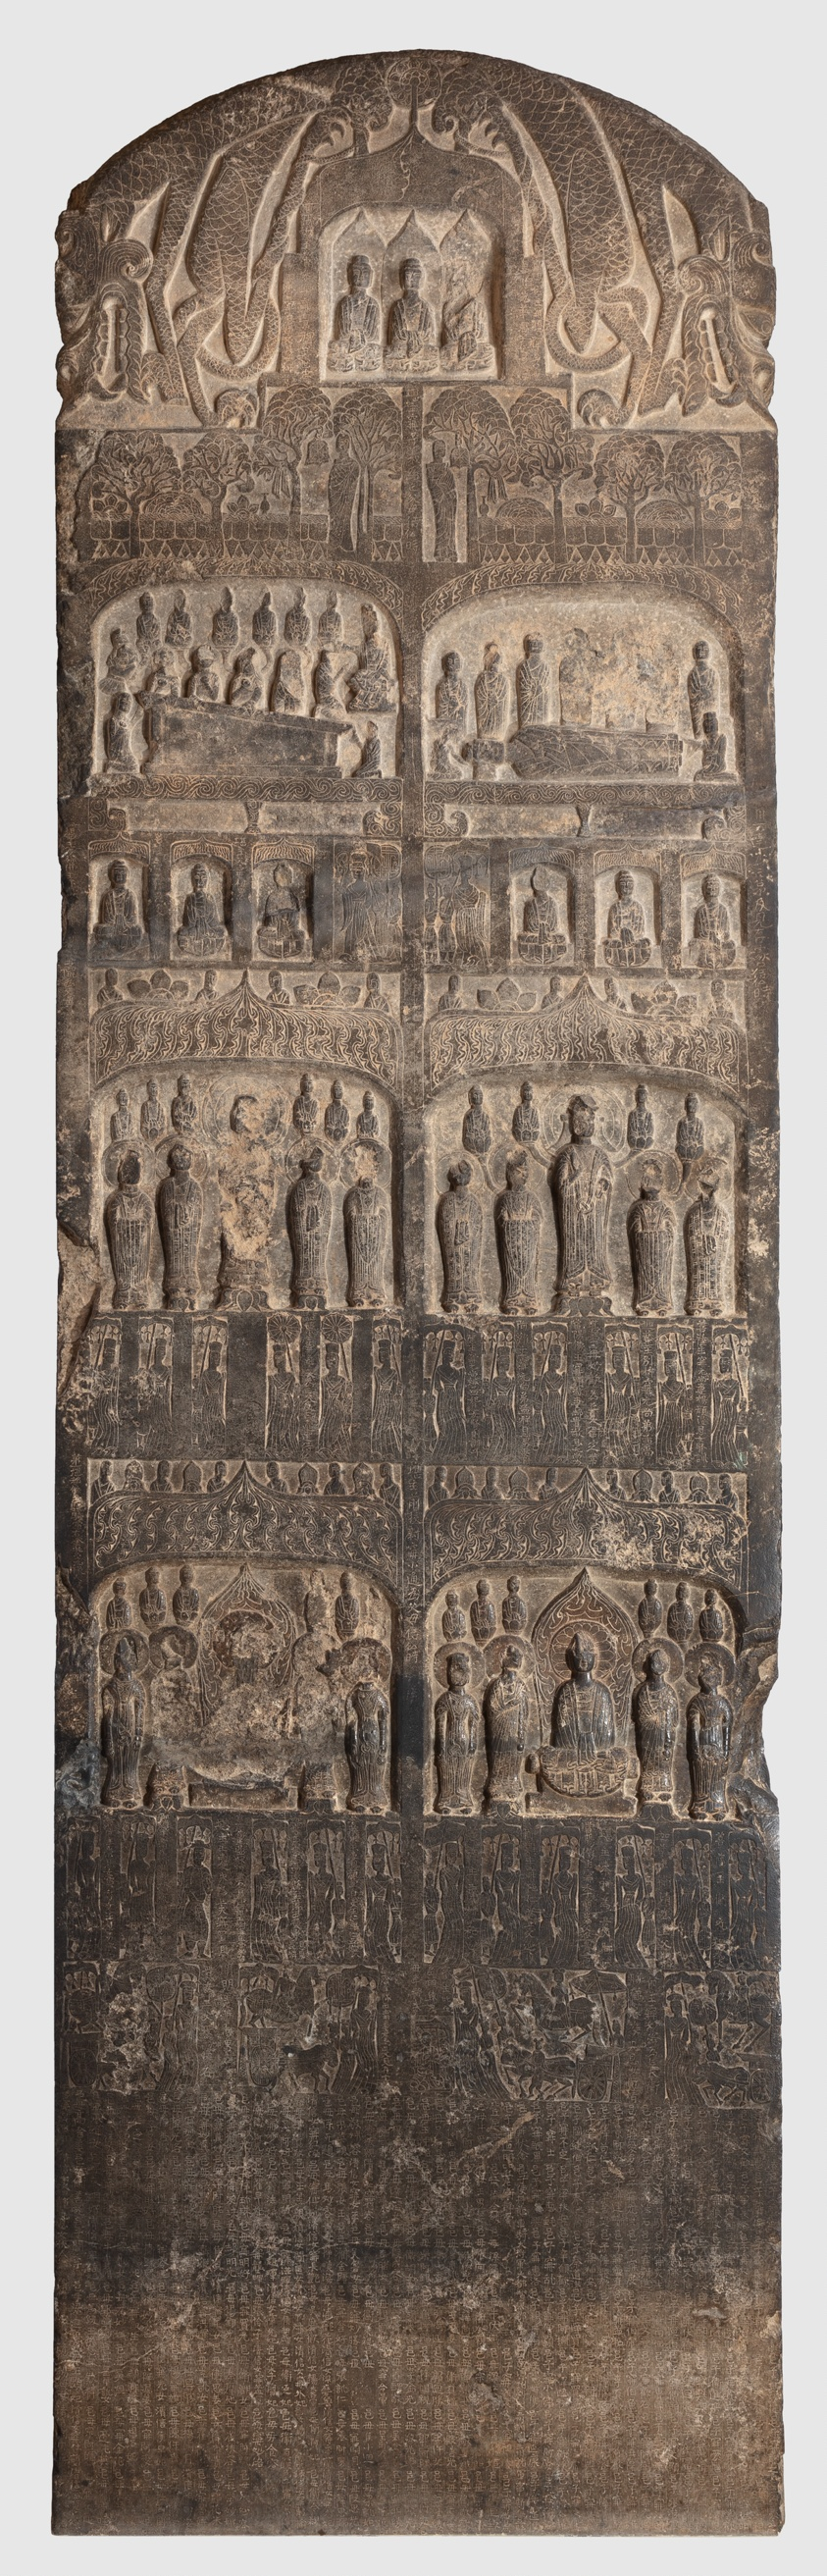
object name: Religious/Ritual Object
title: Buddhist Votive Stele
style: Chinese (culture or style)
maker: China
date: Western Wei dynasty (A.D. 535–557), dated A.D. 551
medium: Stone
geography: China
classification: stone (unidentified); stone; sculpture; asian art; ritual objects